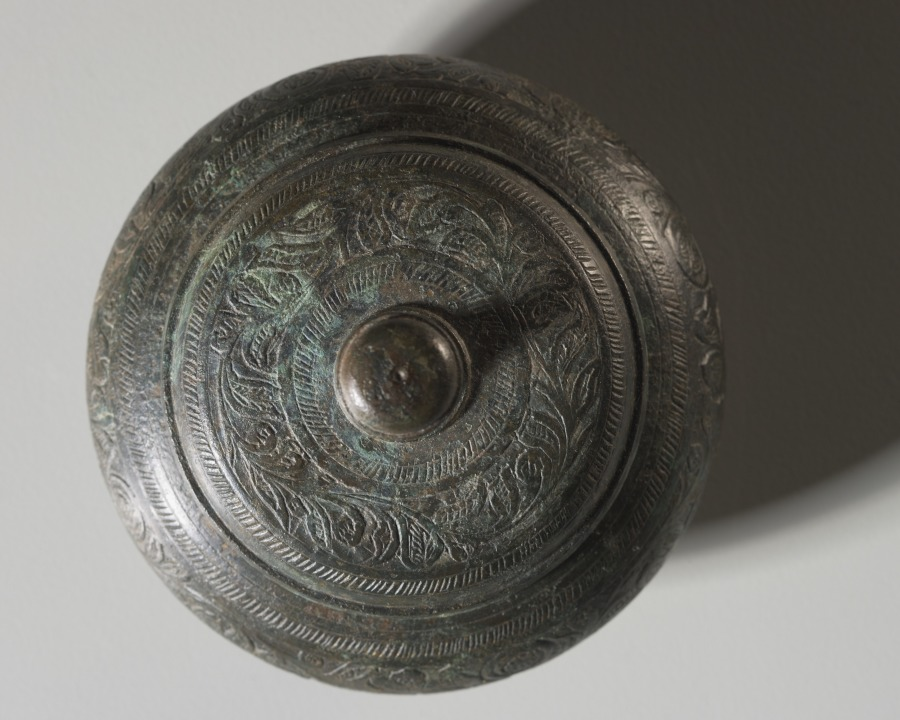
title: Reliquary Box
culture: Pakistan, Gandhara, probably Swat, late Kushan period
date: 200–400 CE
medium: bronze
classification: Metalwork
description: This casket in bronze represents the great variety of reliquary caskets. It is round, has a low foot, and is covered with a lid (with raised handle) that fits over the vessel rather than being inset. It is a traditional shape frequently encountered in Gandharan reliquaries, but its slight flattening and elaborate decoration imply a slightly late date. A central band of a floral creeper decorates the main body of the box and its lid, and is framed on both sides by narrower fluted bands. This type of freehand design is characteristic of the late Kusana-early Gupta period. Similar floral patterns are found in another CMA object (1972.164), the lid of a box showing combat between a man and a lion, which also dates to a later period. There the design fills the vacant areas in the busy composition. This pattern, however, has its antecedents in the Begram ivories . which, according to most sources, pre-date the Sasanian invasion of the mid-third century AD. Therefore, it can be assumed that this type of floral decoration was already in use in the third century and that this reliquary box probably dates to the third-fourth century AD. The bronze alloy, in its somewhat silverish-metallic appearance, seems to be very close to the material used in the Swat bronzes, which suggests that Swat may also be the provenance for this reliquary.